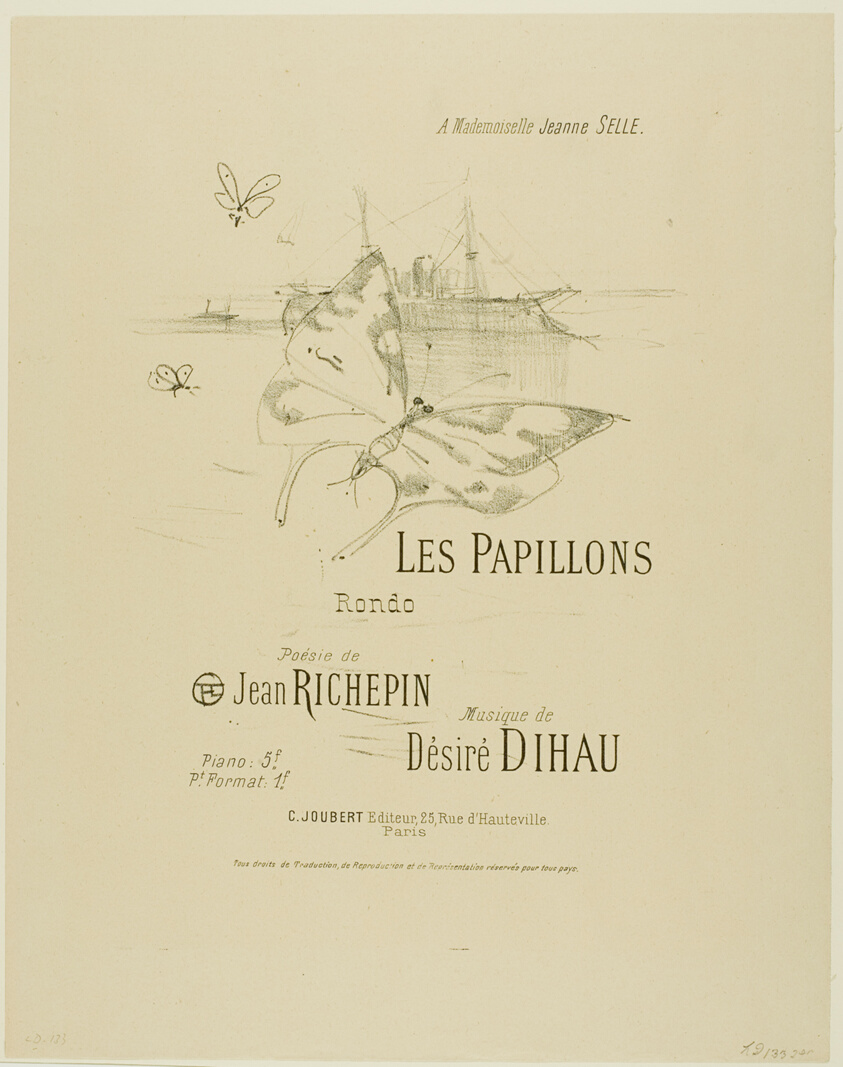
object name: Print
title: The Butterflies, from Mélodies de Désiré Dihau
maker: Henri de Toulouse-Lautrec (French, 1864-1901)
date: 1895, published 1935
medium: Lithograph on cream wove paper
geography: France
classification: lithograph; print; prints and drawing